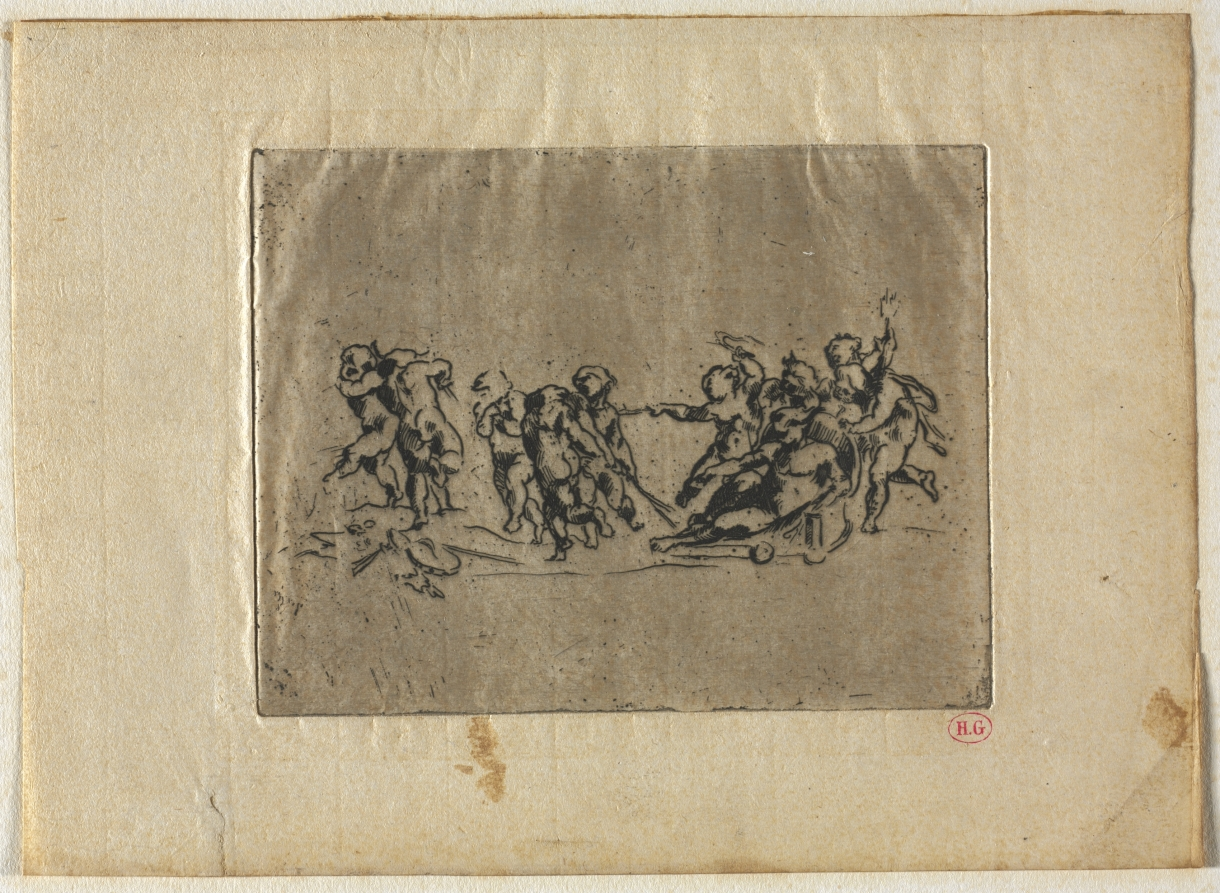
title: Bacchanal with Children and Chariot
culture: France, 19th century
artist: Jean-Baptiste Carpeaux (French, 1827–1875)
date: c. 1860–70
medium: etching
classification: Print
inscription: below the lower right platemark edge: stamp for Hector Giacomelli (Lugt 1311)